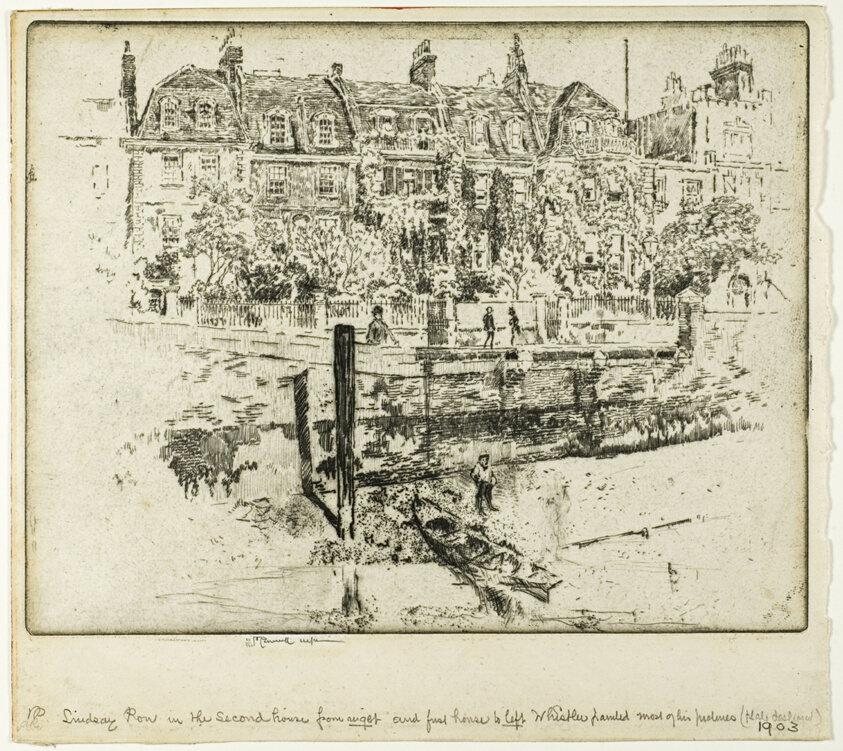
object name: Print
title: Lindsay Row, Chelsea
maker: Joseph Pennell (American, 1857-1926)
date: 1903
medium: Etching on heavy ivory wove paper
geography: United States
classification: etching; print; prints and drawing